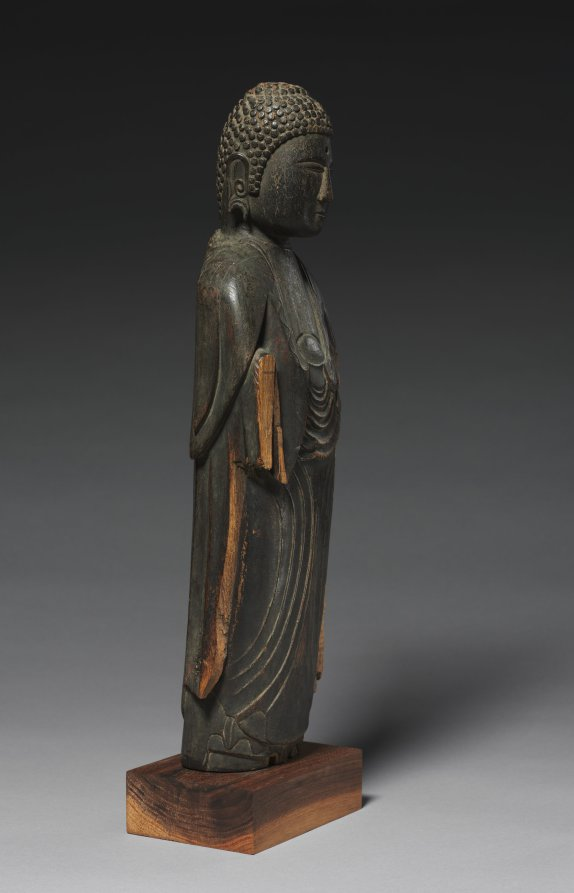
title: Sakyamuni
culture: Korea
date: 1900s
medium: wood with traces of black lacquer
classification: Sculpture